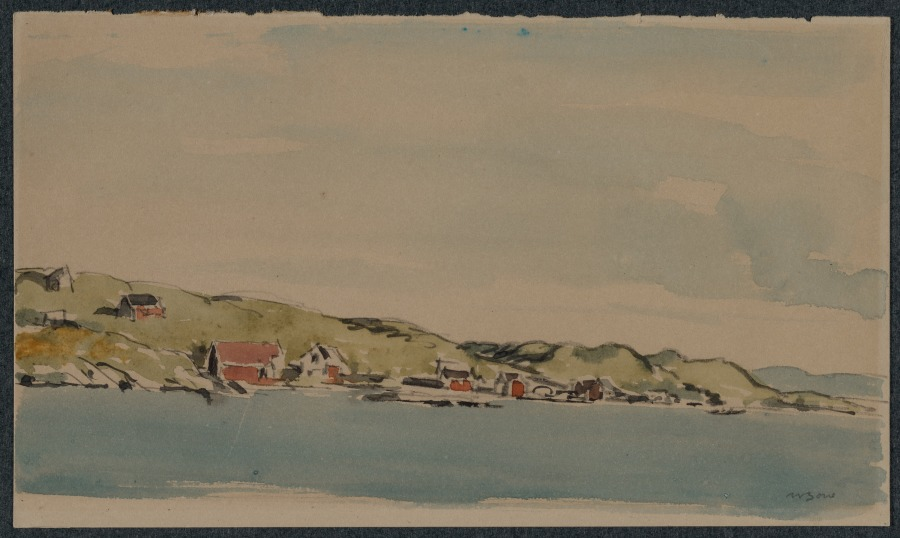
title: Entering Bergen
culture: England, 20th century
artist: Muirhead Bone (British, 1876–1953)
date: c. 1896–1953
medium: watercolor and graphite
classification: Drawing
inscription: Lower right, in graphite: M. Bone